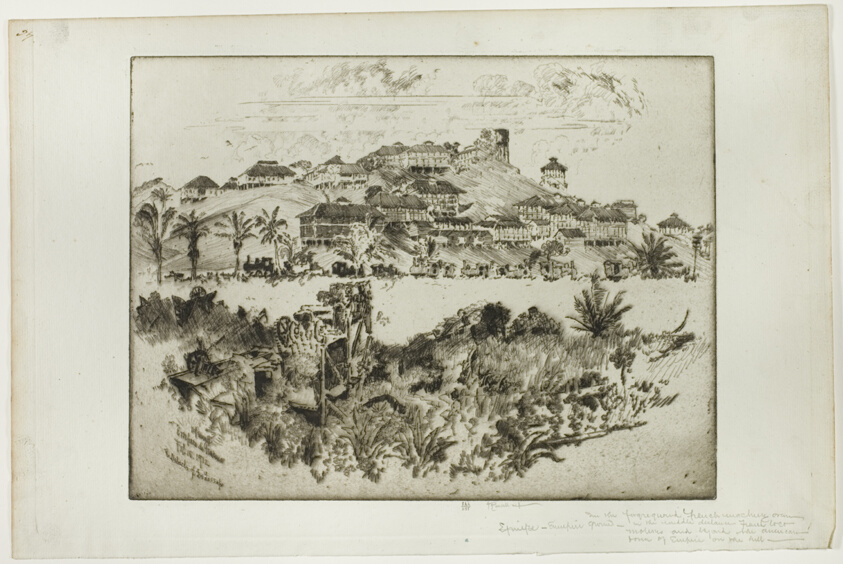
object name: Print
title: The Debacle of de Lesseps, Panama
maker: Joseph Pennell (American, 1857-1926)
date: 1912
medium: Etching on ivory laid paper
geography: United States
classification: etching; print; prints and drawing